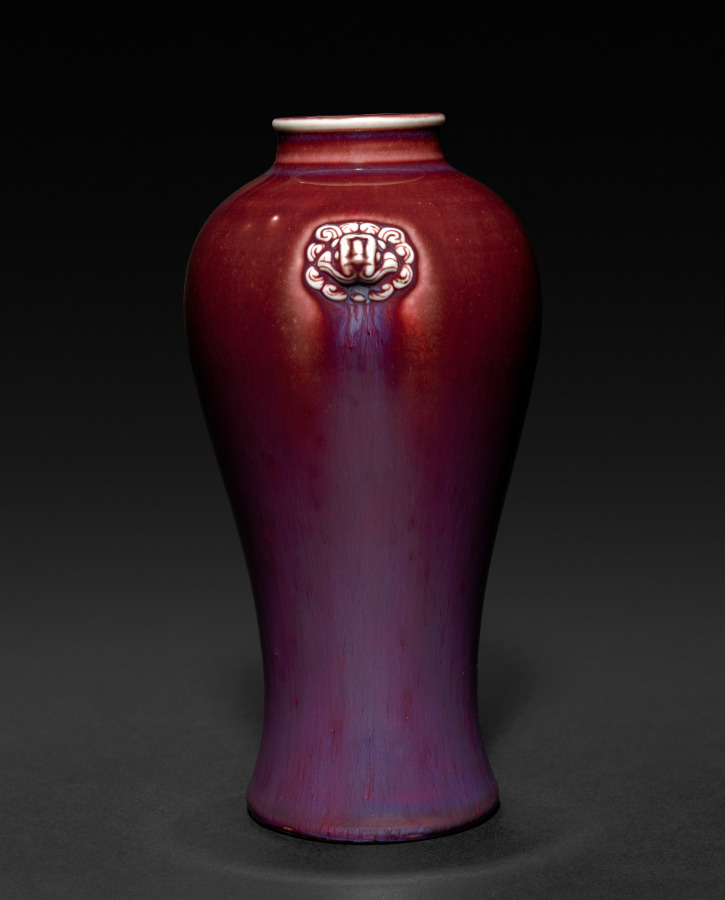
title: Single Stem Vase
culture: Japan, Taishō period (1912–26)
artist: Seifū Yohei IV (Japanese, 1872–1951)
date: 1914–46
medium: Porcelain with molded design and copper-red glaze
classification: Ceramic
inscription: 清風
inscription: 清風造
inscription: 成山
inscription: 清風盧人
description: This vase is copper red in color at the top and becomes purple closer to the bottom, not unlike a Chinese transformation or flambé glaze with mottling and dripping of the glaze. The lip of the vase and much of the lion-head designs remain white. On the box lid, the color of the glaze is called shinsha, which is often glossed as copper red or oxblood, or sometimes cinnabar. Here, it is meant to refer to a Qing-dynasty glazing technique developed in an effort to reproduce a red glaze used during the reign of the Xuande emperor (1426–35) of the Ming dynasty.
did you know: This vase has lion heads for “ears."